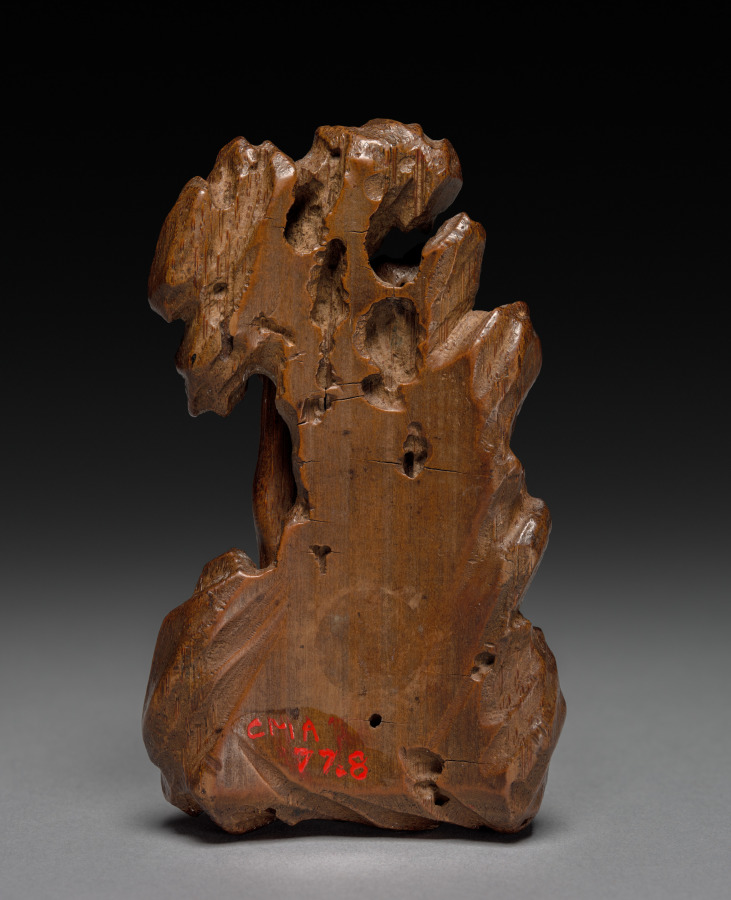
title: Clip for Paper with Sage Seated Under a Pine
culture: China, Ming dynasty (1368–1644)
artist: Pu Zhongqian (Chinese, active 1600s)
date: 1600s or 1700s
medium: carved bamboo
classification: Wood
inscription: signed by the artist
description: In China, access to political power was granted to those who passed the civil service examinations, a system that offered official service only at a high level of education. Chinese literati-officials whose daily routine was administrative work in an office, enjoyed precious objects on their writing desks that offered distraction and demonstrated good taste. By the Ming (1368–1644) and Qing (1644–1911) dynasties, these utensils of the literati studio became also collectibles and were treasured as artworks. Desk objects included paper weights, seals and seal paste boxes, brush rests, wrist rests, brush holders, water droppers, ink cakes, miniature mountains, and albums, all ranging in material from jade, gilt bronze, lacquer, and wood to porcelain.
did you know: Pu Zhongqian was considered a master bamboo carver.